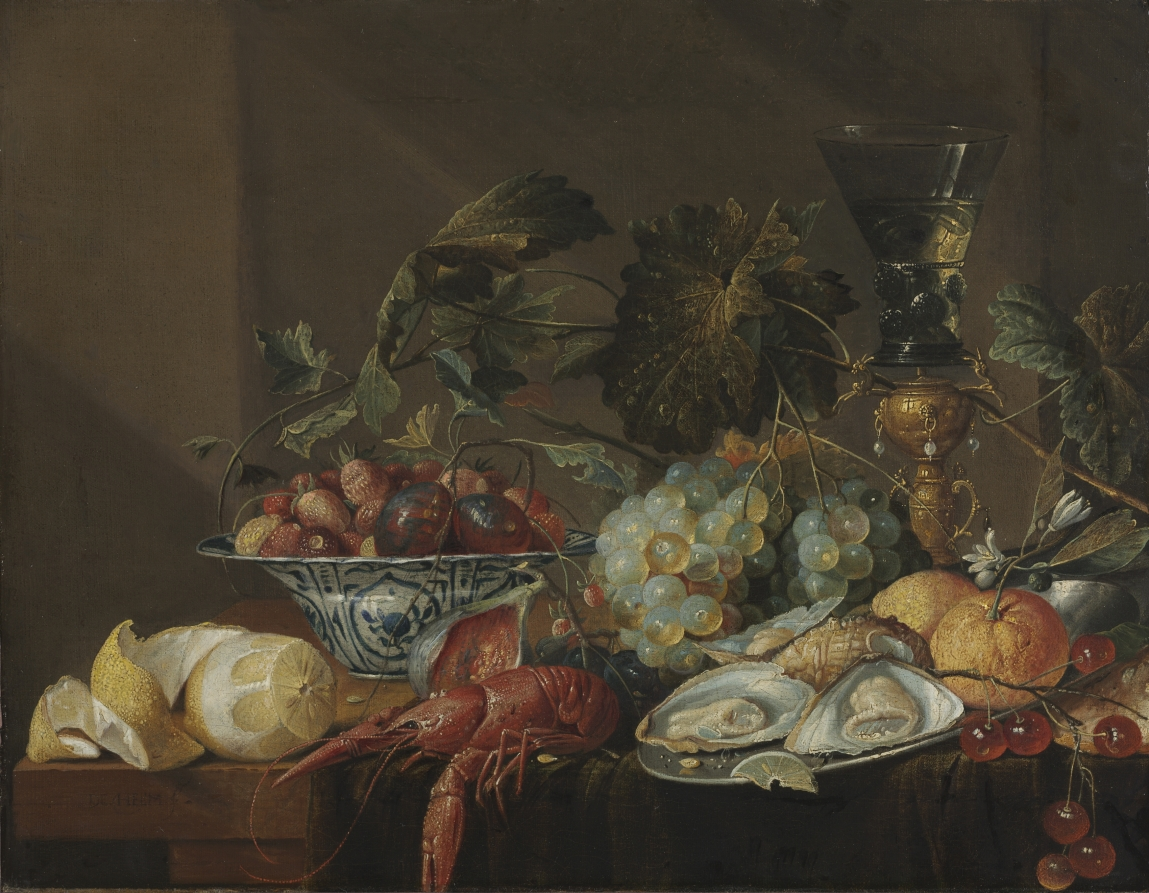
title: Still-Life with Crayfish, Oysters, and Fruit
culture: Flanders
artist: follower of Cornelis de Heem (Flemish, 1631–1695)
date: late 1600s or early 1700s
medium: oil on canvas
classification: Painting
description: The porcelain bowl in this painting most likely came from China. Political turbulence in China effectively eliminated ceramic imports to the West by the 1640s, so the bowl would have been considered at least as valuable as the gold object on the table.